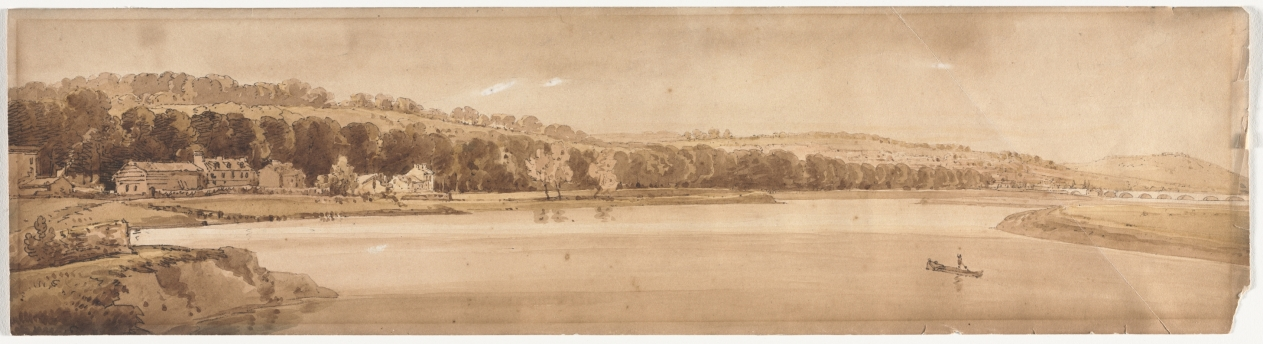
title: Twenty Views of Paris and Environs: View of St. Cloud and Mount Calvary taken from Pont de Sêve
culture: England, early 19th Century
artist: Thomas Girtin (British, 1775–1802)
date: 1802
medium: soft-ground etching with bistre wash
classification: Print